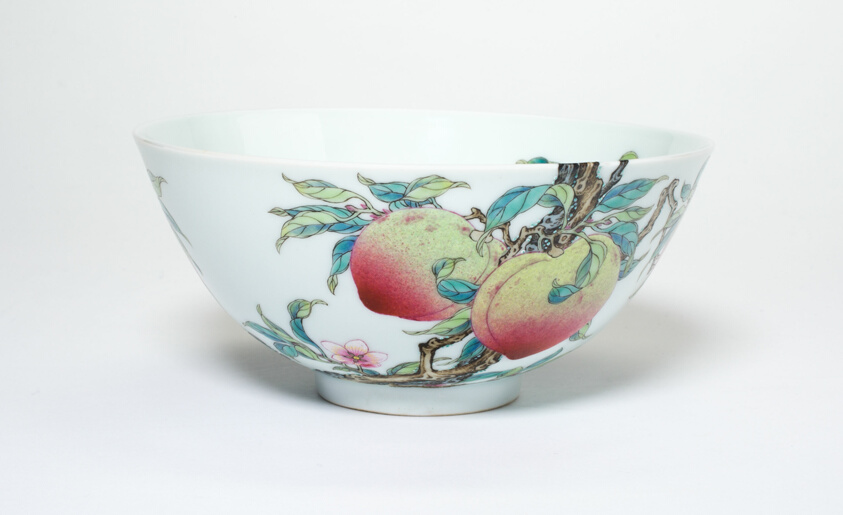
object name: Vessel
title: Bowl with Fruiting Peaches, Tree Peony, Flowering Plum, and Bats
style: Chinese (culture or style)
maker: China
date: Qing dynasty (1644–1911), Yongzheng reign mark and period (1723–1735)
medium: Porcelain painted in overglaze famille rose enamels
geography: China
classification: bowl; porcelain; dish (vessel); ceramics; asian art; vessel